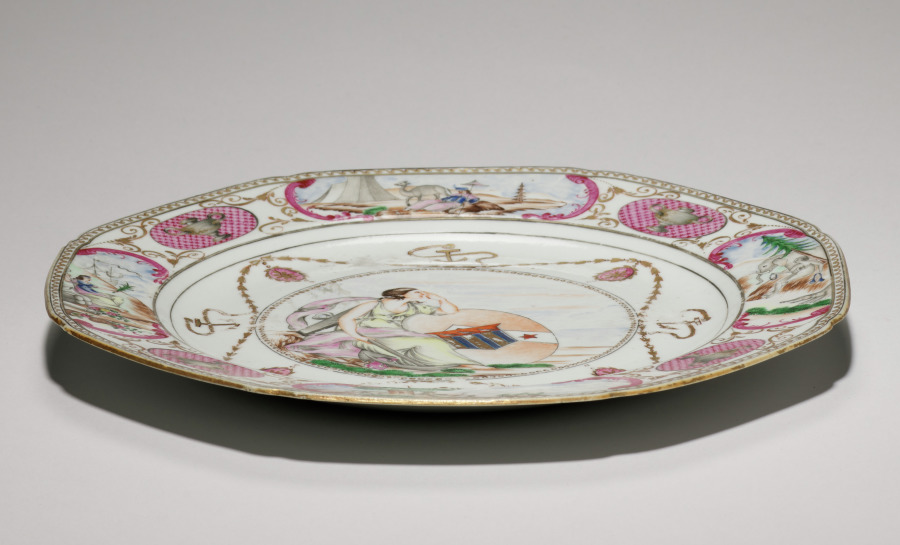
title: Plate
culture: China, Chinese Export, early 19th century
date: c. 1800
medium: porcelain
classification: Ceramic